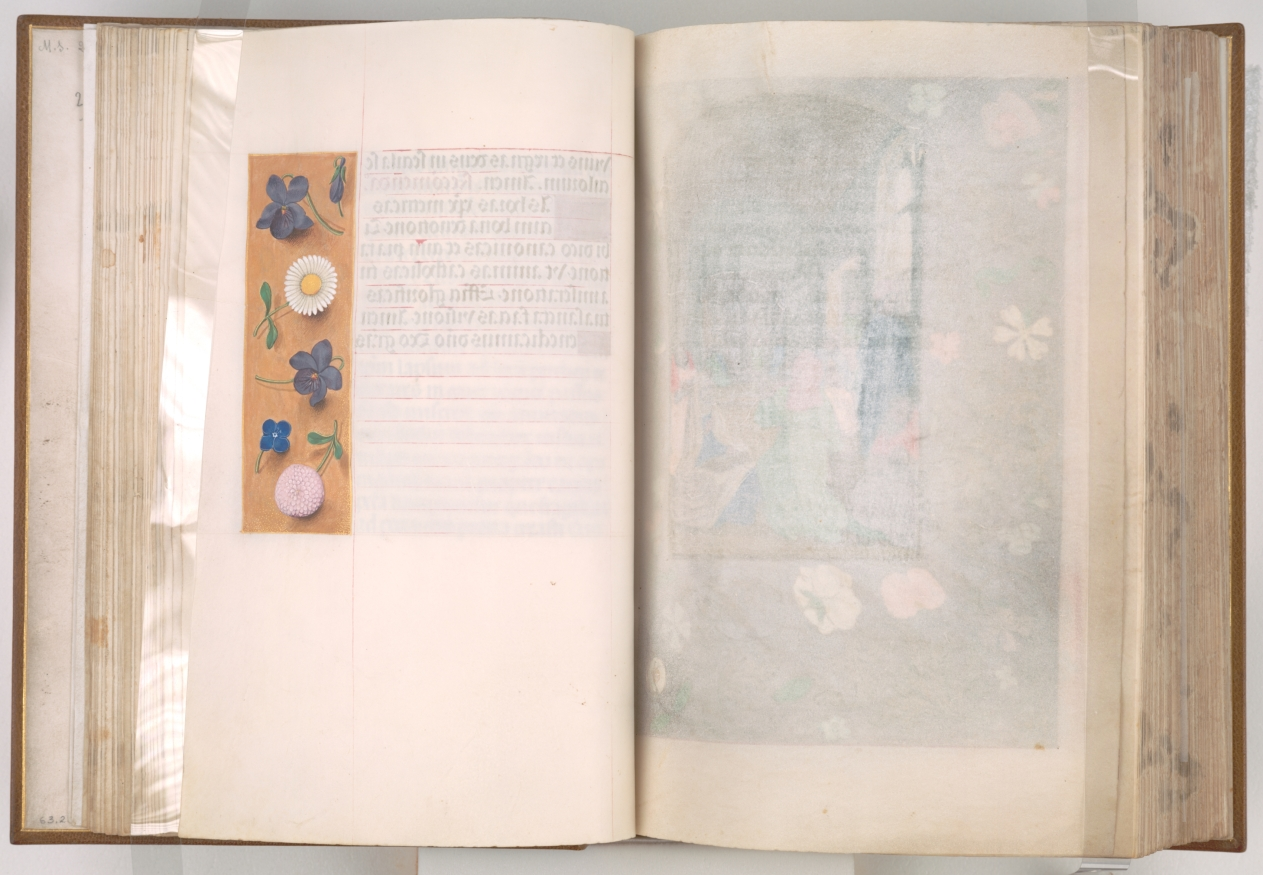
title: Hours of Queen Isabella the Catholic, Queen of Spain: Fol. 31r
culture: Flanders, Ghent and Bruges, late 15th century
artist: Master of the First Prayerbook of Maximillian (Flemish, c. 1444–1519)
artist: and Associates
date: c. 1500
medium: ink, tempera, and gold on vellum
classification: Bound Volume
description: A great lover of Flemish art, Queen Isabella treasured her many devotional books. This deluxe manuscript was created for her private devotions by highly organized and distinctly talented manuscript painters active in Ghent and Bruges. The Ghent-Bruges school represents the culmination of Flemish book painting, whose main features were the use of rich colors, illusionistic effects, a love of landscape, and a strong sense of visual narrative. Manuscripts produced by this circle of artists are renowned for their border decoration featuring a rich variety of realistically painted flowers, scrolling acanthus leaves, birds, and butterflies.